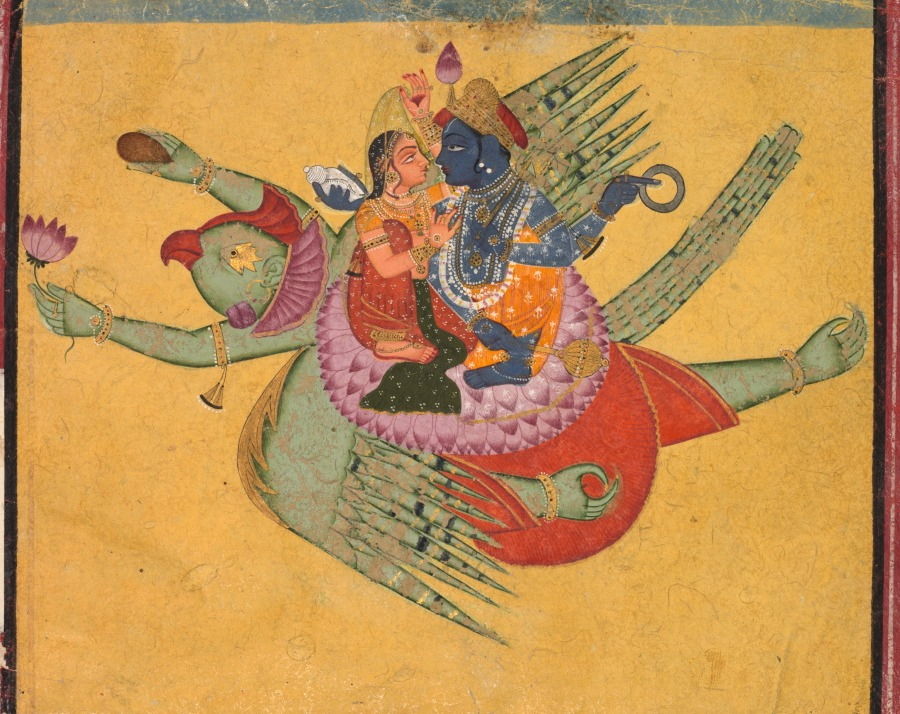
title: Vishnu and Lakshmi on Garuda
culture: India, Rajasthan, Bundi school, 18th century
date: c. 1750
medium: Gum tempera, ink, and gold on paper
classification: Painting